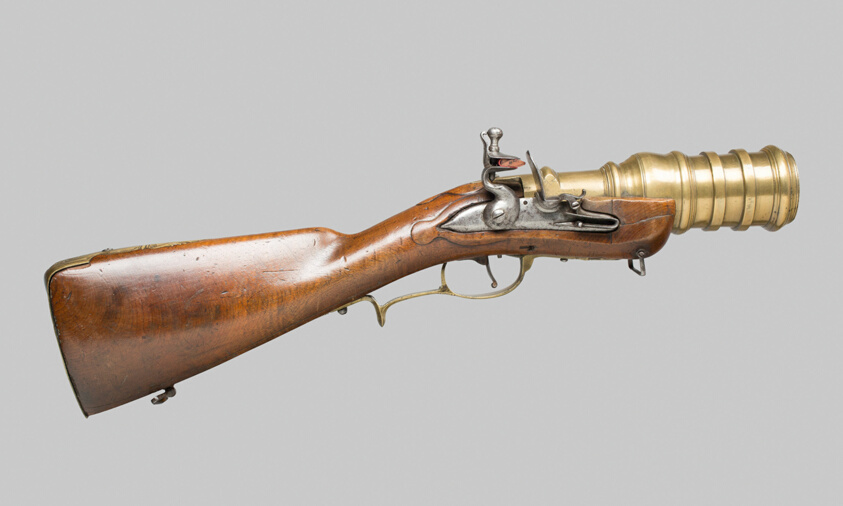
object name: Arms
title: Flintlock "Hand Mortar" Gun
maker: German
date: 1740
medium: Steel, brass, iron, and walnut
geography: Germany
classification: firearm-long gun; arms; arms and armor